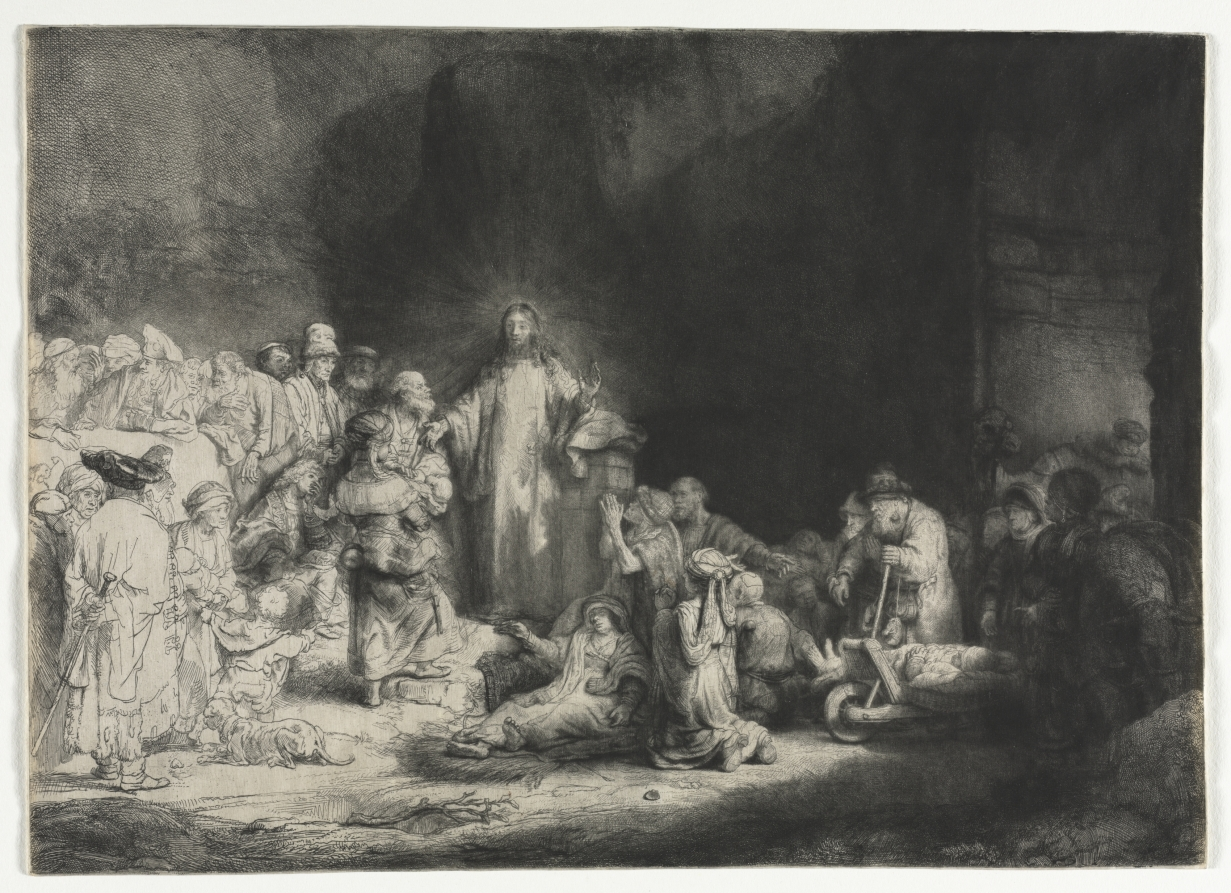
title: The Hundred Guilder Print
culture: Netherlands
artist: Rembrandt van Rijn (Dutch, 1606–1669)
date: c. 1649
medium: etching, drypoint, and engraving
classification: Print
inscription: VERSO, lower center, in graphite: B 74 II ; lower center, in graphite: C. 403[underlined] ; lower right, in graphite: C. 1228 MK ; lower right, in graphite: 93.86[underlined] ; lower right, in graphite: yxvv.